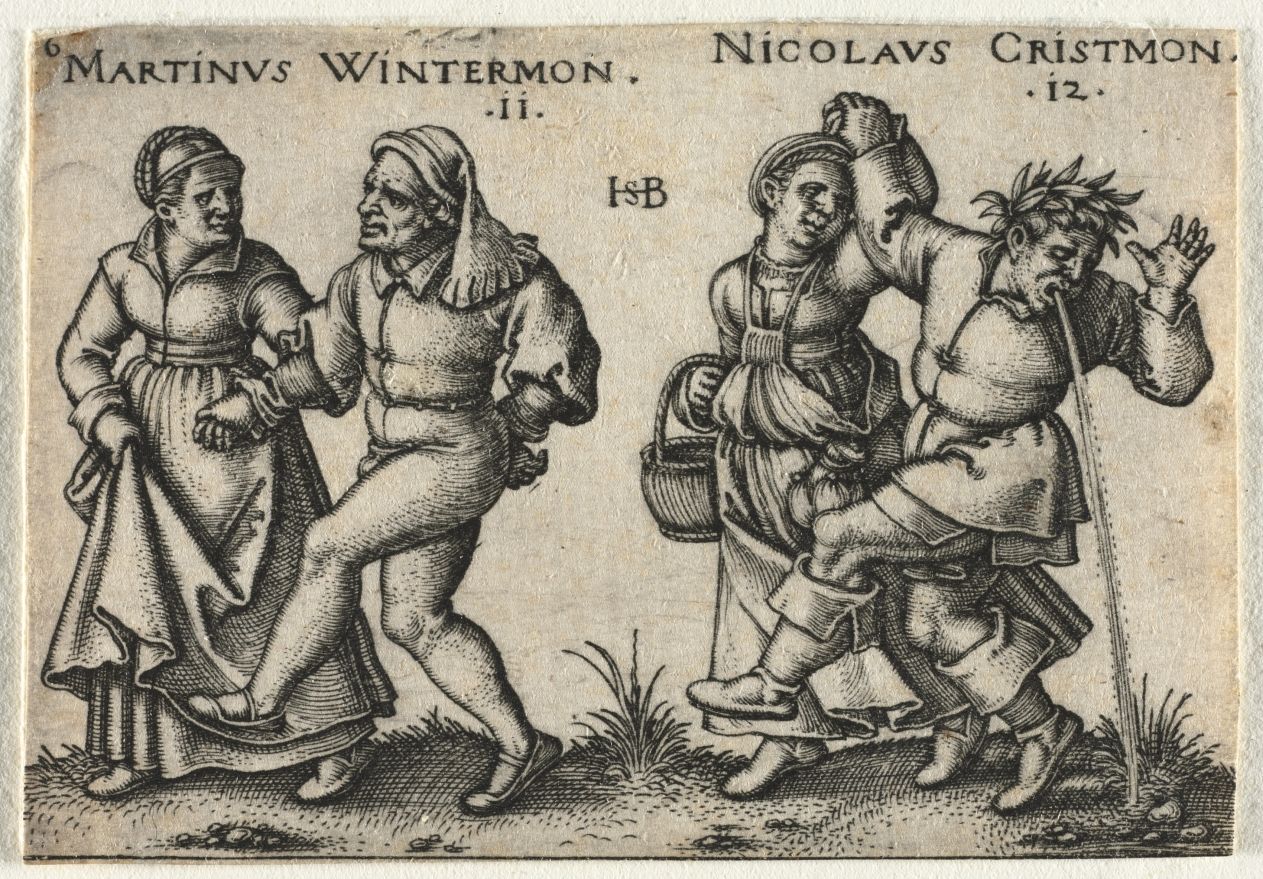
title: The Peasant Wedding or the Twelve Months: 11-Martinus Wintermon 12-Nicolaus Cristmon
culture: Germany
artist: Hans Sebald Beham (German, 1500–1550)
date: 1546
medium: engraving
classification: Print